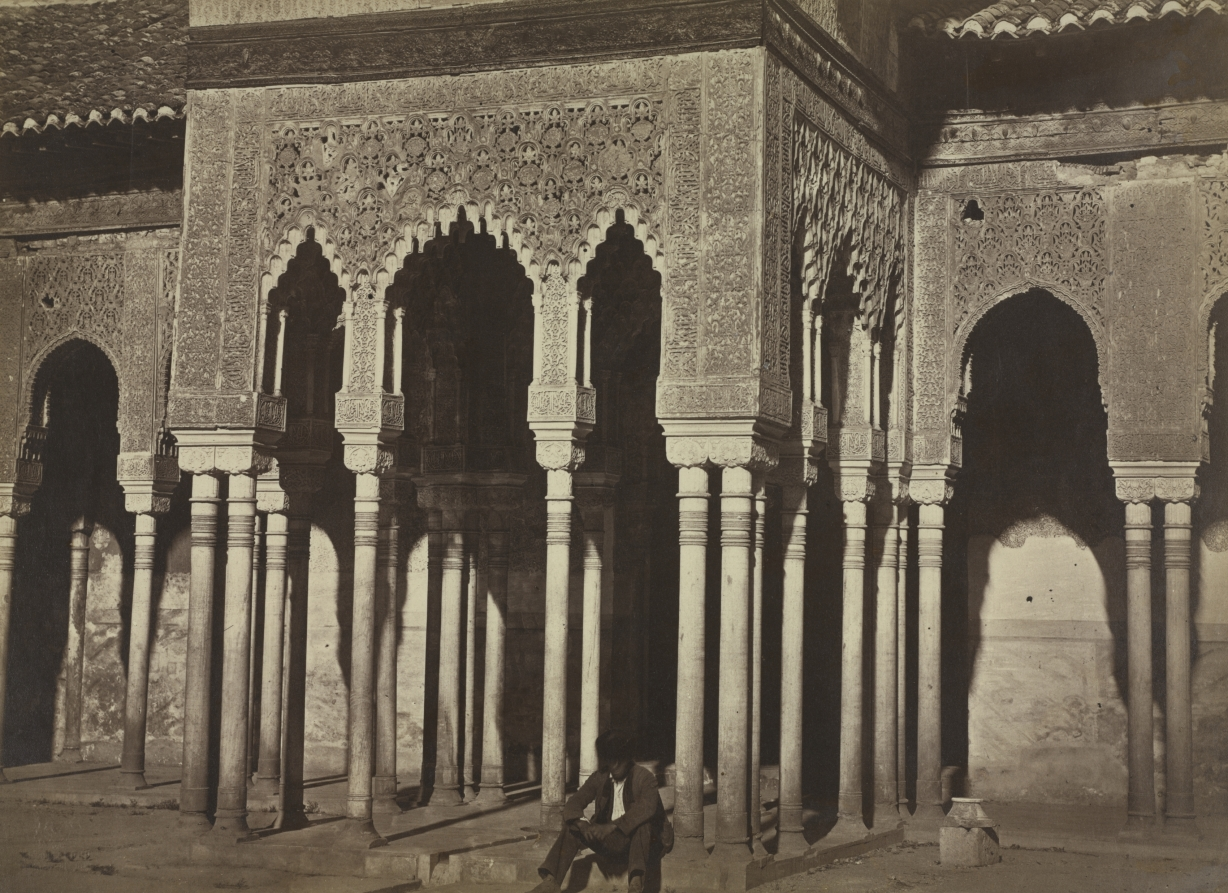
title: Courtyard, Alhambra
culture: England, 19th century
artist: Charles Clifford (British, 1819–1883)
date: 1857–58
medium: albumen print from wet collodion negative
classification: Photograph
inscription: written in pencil on verso: "Temple in the Court of the Lions. Alhambra Palace 'Granada' 75"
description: A solitary male figure sits on the low step in the Court of the Lions, one of the palace’s two principal courtyards. This view emphasizes the building’s architectural elements and intricate molded plaster ornamentation. The brilliant highlights and dense shadows create a remarkable composition of abstract forms. Fallen into disuse, the Alhambra was an alluring and romantic reminder of past glories for travelers during this early era of photography. An accomplished topographical photographer, Charles Clifford lived in Madrid from 1852 until his death in 1863. He became the official photographer to Queen Isabella II in 1858, chronicling her public life and producing photographs of views all over Spain.